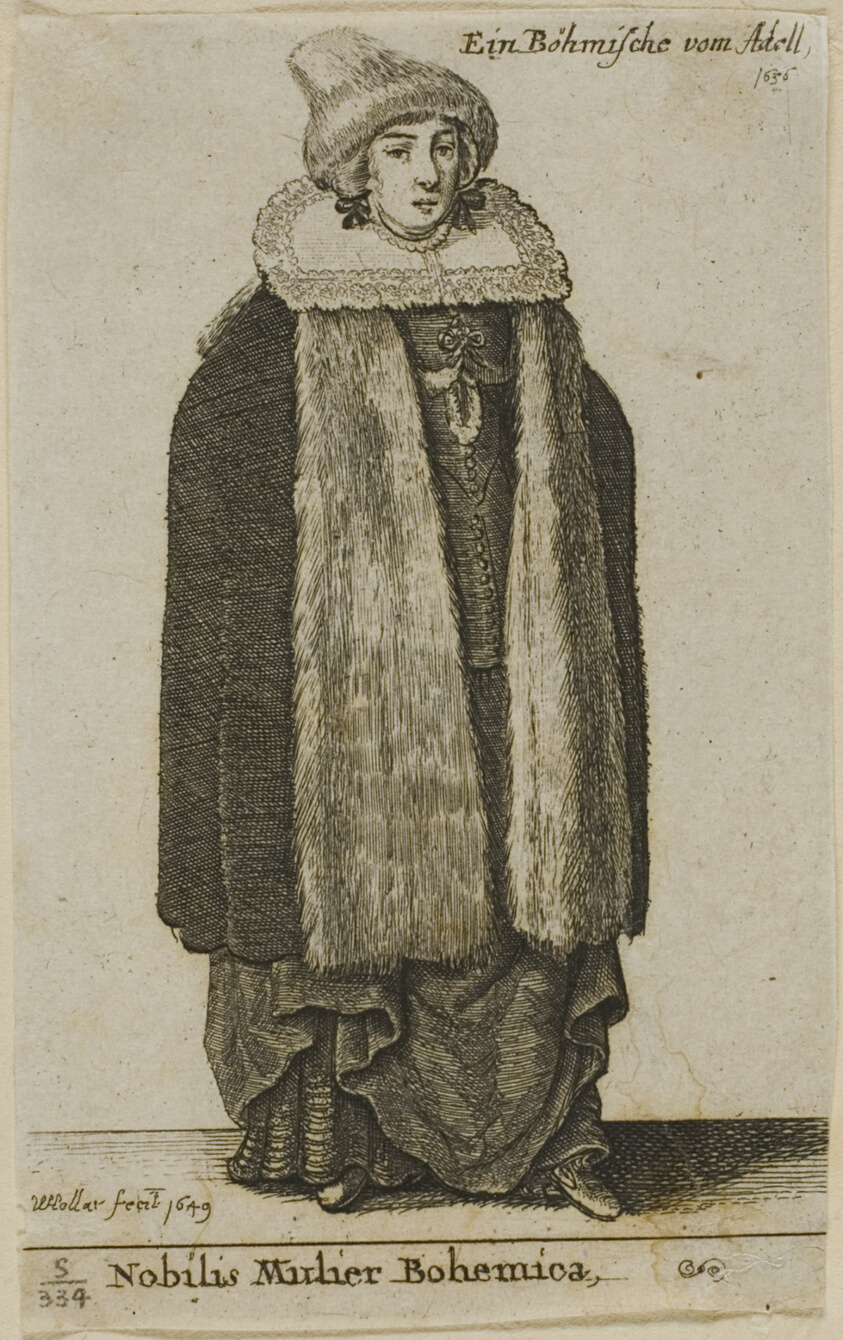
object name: Print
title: Bohemian Noblewoman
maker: Wenceslaus Hollar (Bohemian, 1607-1677)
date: 1649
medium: Etching on gray Asian paper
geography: Bohemia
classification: etching; print; prints and drawing